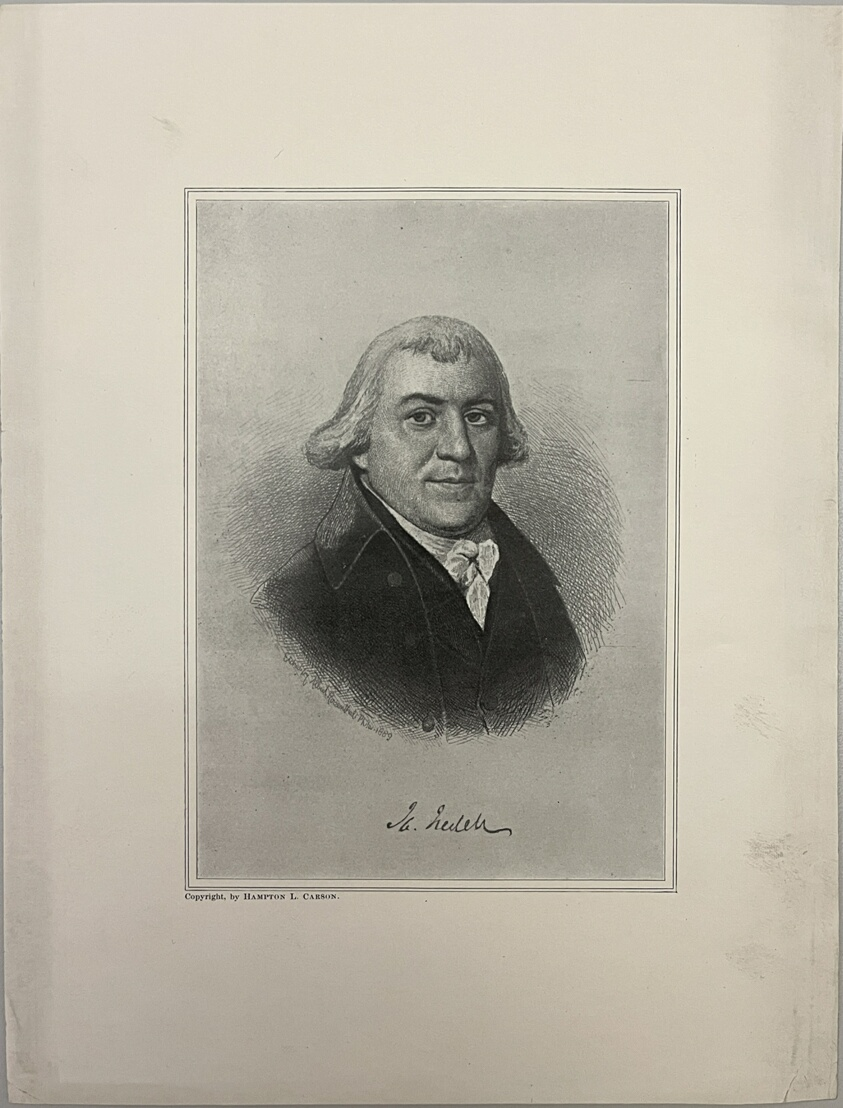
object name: Print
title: Heuten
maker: Albert Rosenthal (American, 1863-1939)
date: 1889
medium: Photolithograph on paper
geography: United States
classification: reproduction; print; prints and drawing